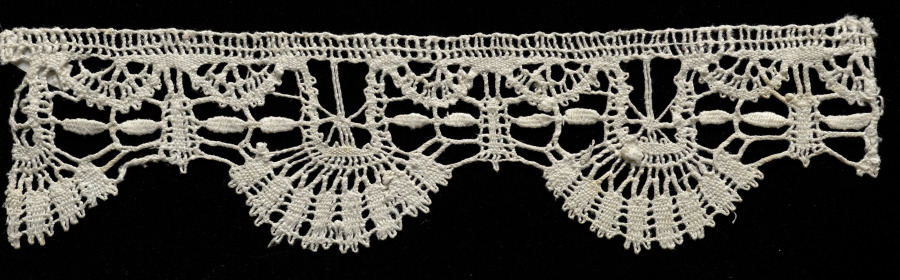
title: Lace Edging with Bell Points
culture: Italy, Genoa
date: 1680–99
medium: Bobbin lace (rose lace)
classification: Lace